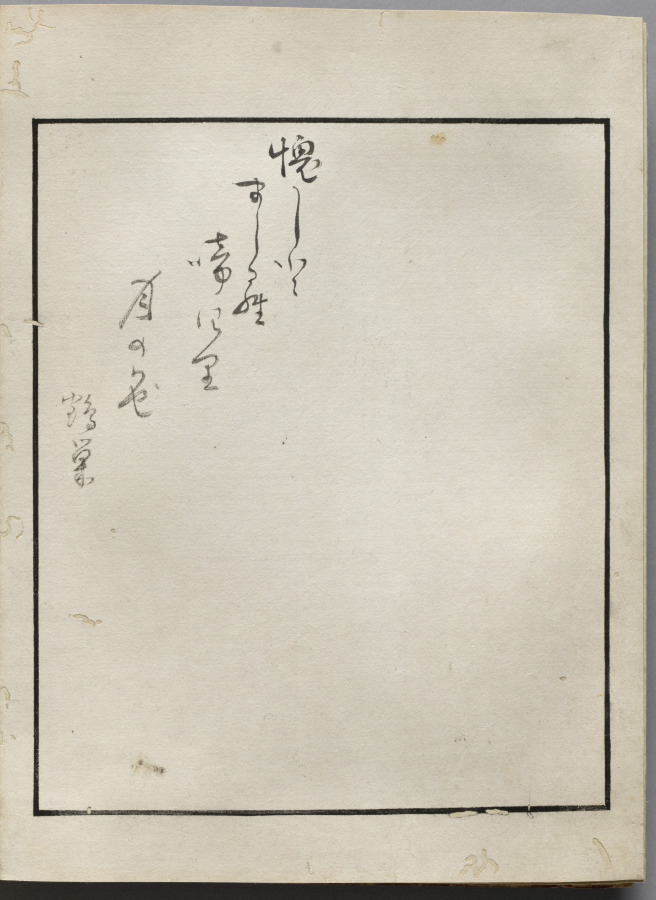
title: Double-Leaf from Album of Actor Portraits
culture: Japan, Edo period (1615–1868)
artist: Shōrakusai (Japanese)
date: c. 1790–1810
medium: double-leaf from an accordion-style album; ink on paper (right) and ink and color on silk (left)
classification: Bound Volume